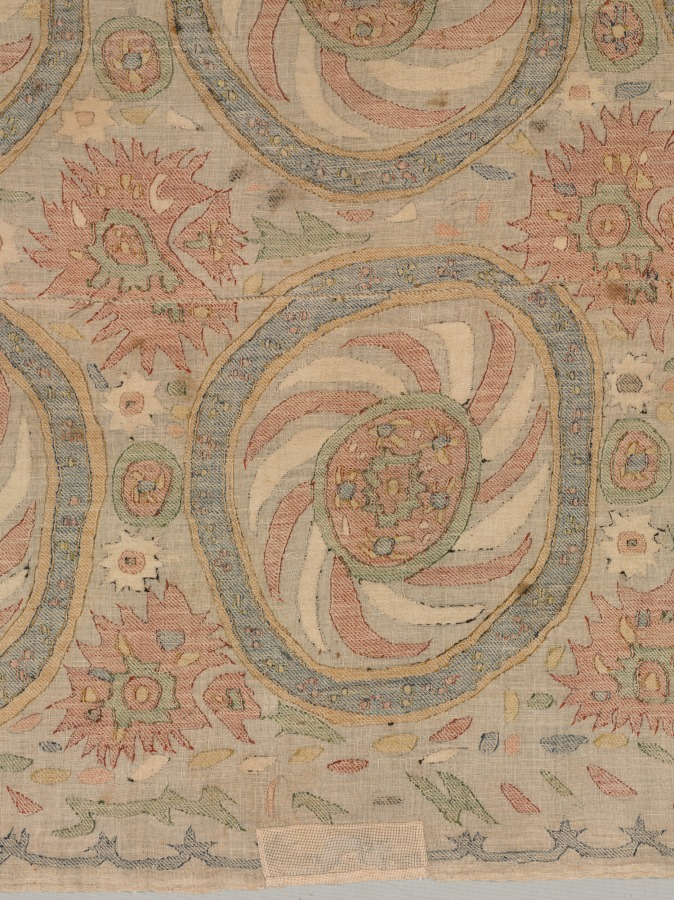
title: Embroidered Cover or Curtain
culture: Turkey, 17th-18th century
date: 17th-18th century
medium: embroidery: silk on linen tabby ground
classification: Embroidery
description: This exuberant pattern of spiraling roundels enlivens a ground of isolated vegetation, despite disintegrated dark brown–black silk thread outlines. Professional draftsmen would have drawn the pattern in ink on the reverse side of several loosely attached, plain linen cloths. They were separated for embroiderers to follow and then reassembled; frequently, the designs do not match perfectly at the seams.